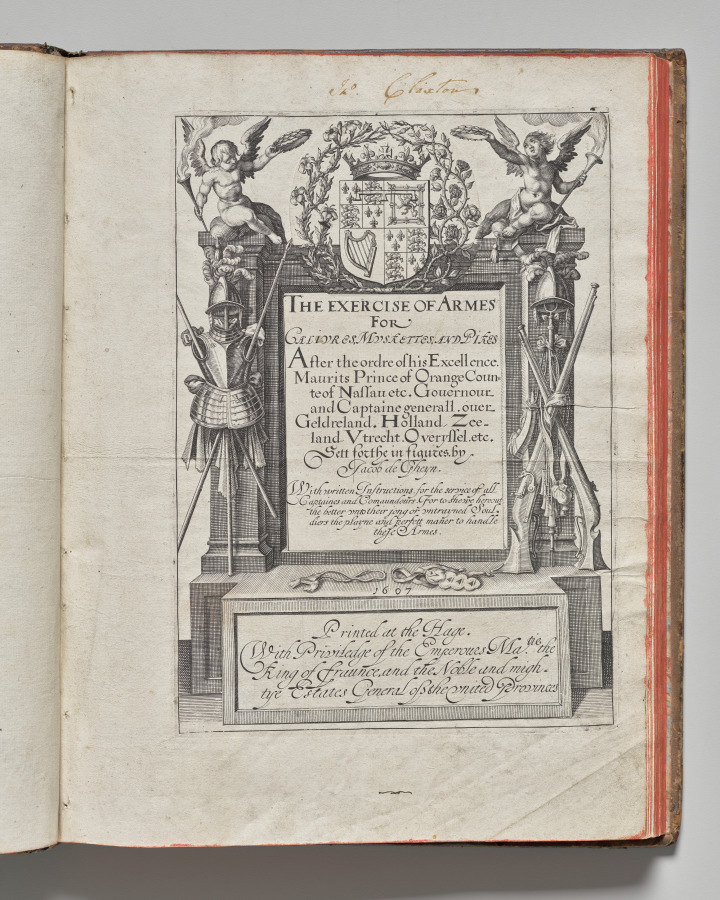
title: The Exercise of Armes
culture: Netherlands, The Hague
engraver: Jacob de Gheyn II (Netherlandish, 1565–1629)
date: 1607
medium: leather bound paper, 117 engraved plates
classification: Bound Volume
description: The Exercise of Armes, published in 1607–8, is one of the most famous manuals of arms. Jacob De Gheyn's book became popular all over Europe and was quickly translated into several languages. Its 117 copper engravings portray the step-by-step sequence for training foot soldiers in the handling of standard weaponry of 17th-century warfare: muskets, matchlock or calivers, and pikes.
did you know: The depiction of the soldiers in this book inspired Rembrandt when painting his famous The Night Watch.